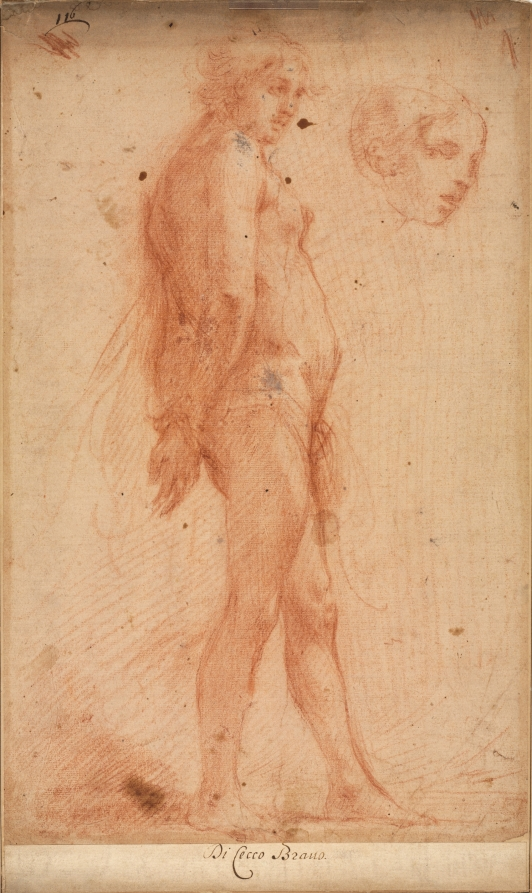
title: Study of a Standing Male Nude, with a Study of Head in Three-Quarter Profile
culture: Italy, 17th century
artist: Cecco Bravo (Italian, 1607–1661)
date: c. 1640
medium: red chalk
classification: Drawing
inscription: upper left, in brown ink: 116 [underlined]; [red chalk scribbles at upper left and upper right] lower center, in brown ink (on paper strip laid down on bottom margin of primary support and on secondary support): Di Cecco Bravo